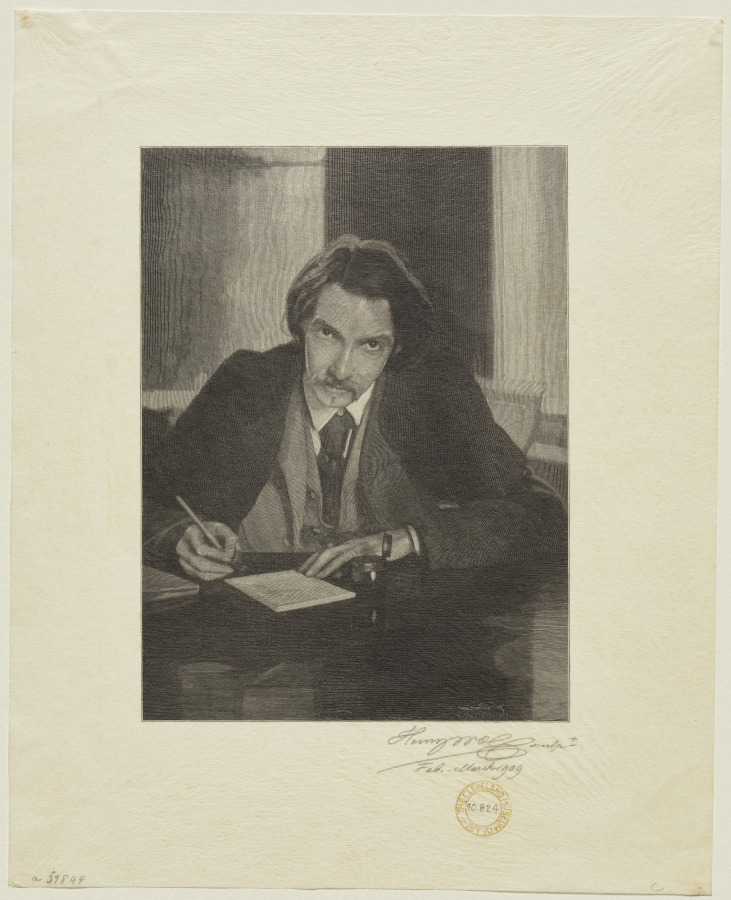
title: Robert Louis Stevenson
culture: America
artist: Henry Wolf (American, 1852–1916)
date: 1909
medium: wood engraving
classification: Print